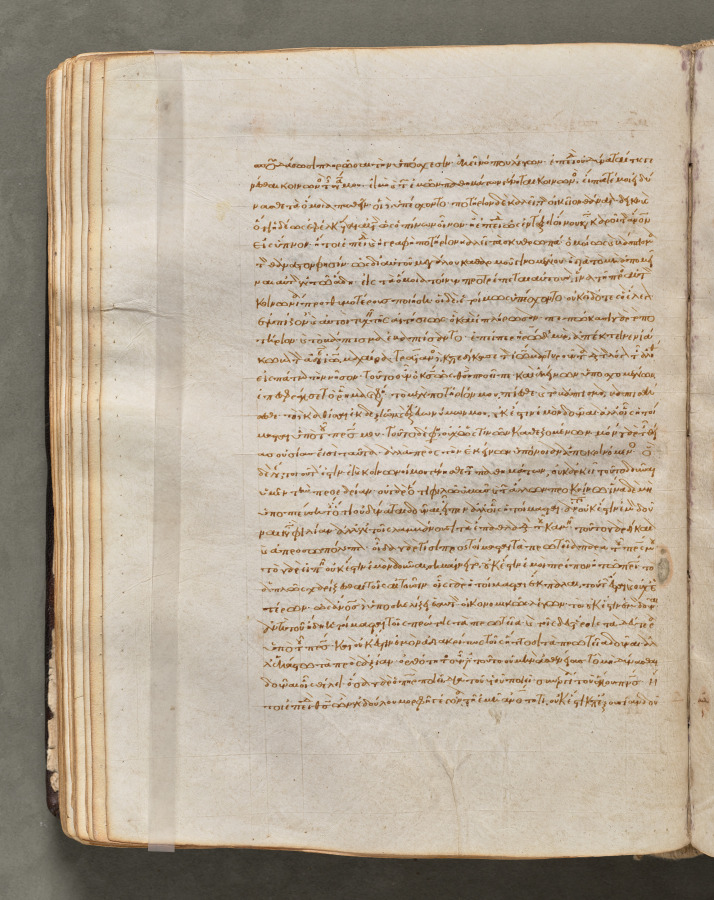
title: Text, folio 89 (verso), from a Gospel Book with Commentaries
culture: Byzantium, Constantinople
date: c. 1000–1100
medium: ink, tempera, and gold on vellum; leather binding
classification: Bound Volume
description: Each of the four gospels in this book opens on a page with brilliantly illuminated borders depicting the author of the text as well as birds-principally peacocks, symbols of the immortality of the soul-and fountains, representing the fountain of life and the salvation of the soul. This volume consists of 428 leaves with texts in Greek. Its level of sophistication suggests that it was probably written and decorated in a monastery in Constantinople.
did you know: Gospel Books were carried in procession through Byzantine churches.